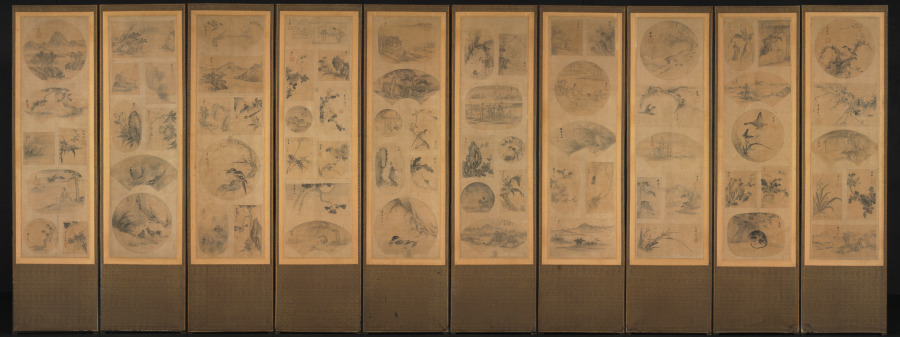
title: Painting of One Hundred Themes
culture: Korea, Joseon dynasty (1392–1910)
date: late 1800s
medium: Ten-panel folding screen affixed with album leaves (obverse), calligraphy (reverse), ink and color on silk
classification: Painting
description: The front of this screen features an assortment of subjects: birds and flowers, landscapes, and scenes of everyday life, mostly in monochromatic ink with light colors. The screen’s reverse side conveys a number of classical poems about the fleeting beauty of the four seasons. Traditionally, only one side of a folding screen bears painted or embroidered images, since these were used as a background furnishing. In Korean houses by the 1800s and early 1900s, however, two-sided folding screens became noticeably popular, possibly inspired by Japanese double-sided folding screens, which mainly served as room dividers in Japanese households.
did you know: The way of displaying small images of various subjects became one of the most popular type of painting toward the end of the 19th century.